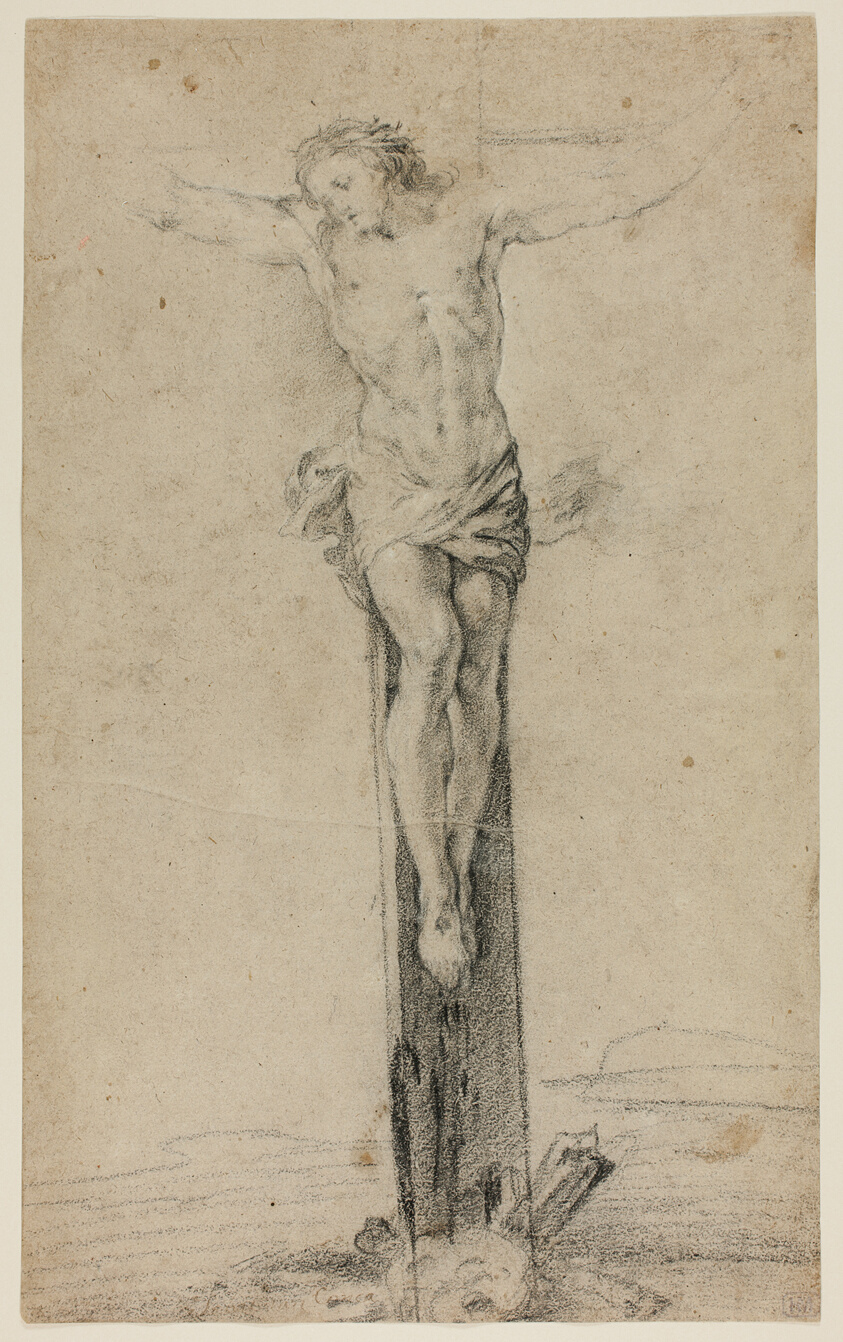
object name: Drawing and Watercolor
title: Christ on the Cross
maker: Attributed to Sebastiano Conca; Italian, 1680-1764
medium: Black chalk with touches of white chalk, on brown laid paper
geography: Italy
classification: chalk; drawings (visual works); prints and drawing